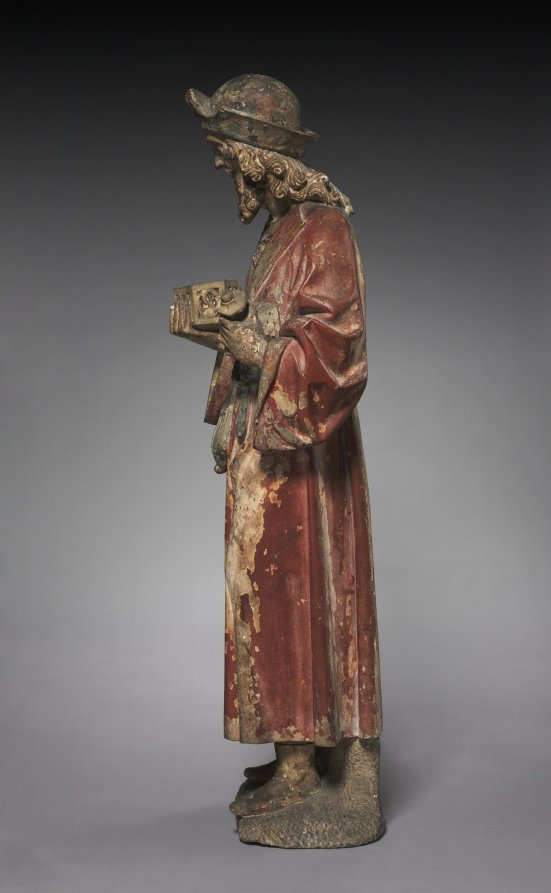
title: Magus from an Adoration Group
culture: France, possibly Champagne, 15th century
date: c. 1460–1475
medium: polychromed limestone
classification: Sculpture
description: This sculpture represents one of the three Magi or kings who witnessed the birth of Jesus. The Magi are identified as Caspar, Melchior, and Balthazar and are typically shown in art bearing their gifts of gold, frankincense, and myrrh. Joseph is often present in these scenes as are shepherds.The single figure shown here was originally part of a sculptural group with many figures. He is shown holding an ornate receptacle with lid. Other figures from the group are not known to have survived, and which Magus the sculpture was intended to represent cannot be clearly established.